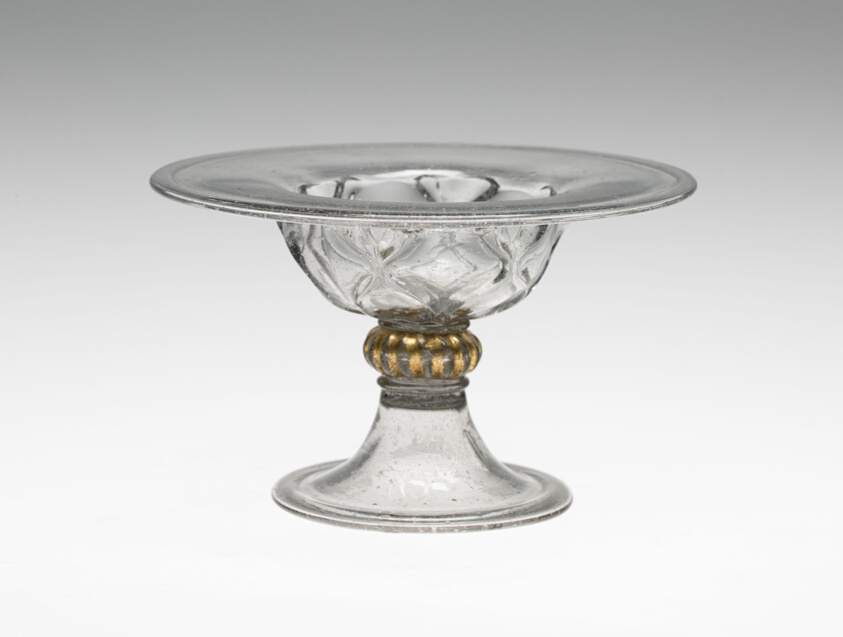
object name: Glass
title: Salt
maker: Innsbruck, Germany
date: 16th century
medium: Glass with gilding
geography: Innsbruck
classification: compote; glass; dish (vessel); european decorative arts